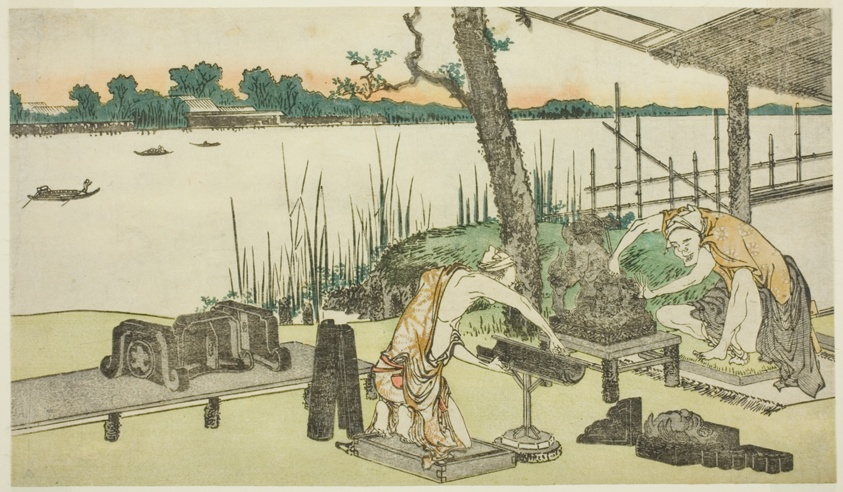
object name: Print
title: Potters at Work - Imado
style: Japanese (culture or style)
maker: Katsushika Hokusai 葛飾 北斎; Japanese, 1760-1849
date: c. 1808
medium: Color woodblock print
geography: Japan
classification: woodblock print; print; asian art